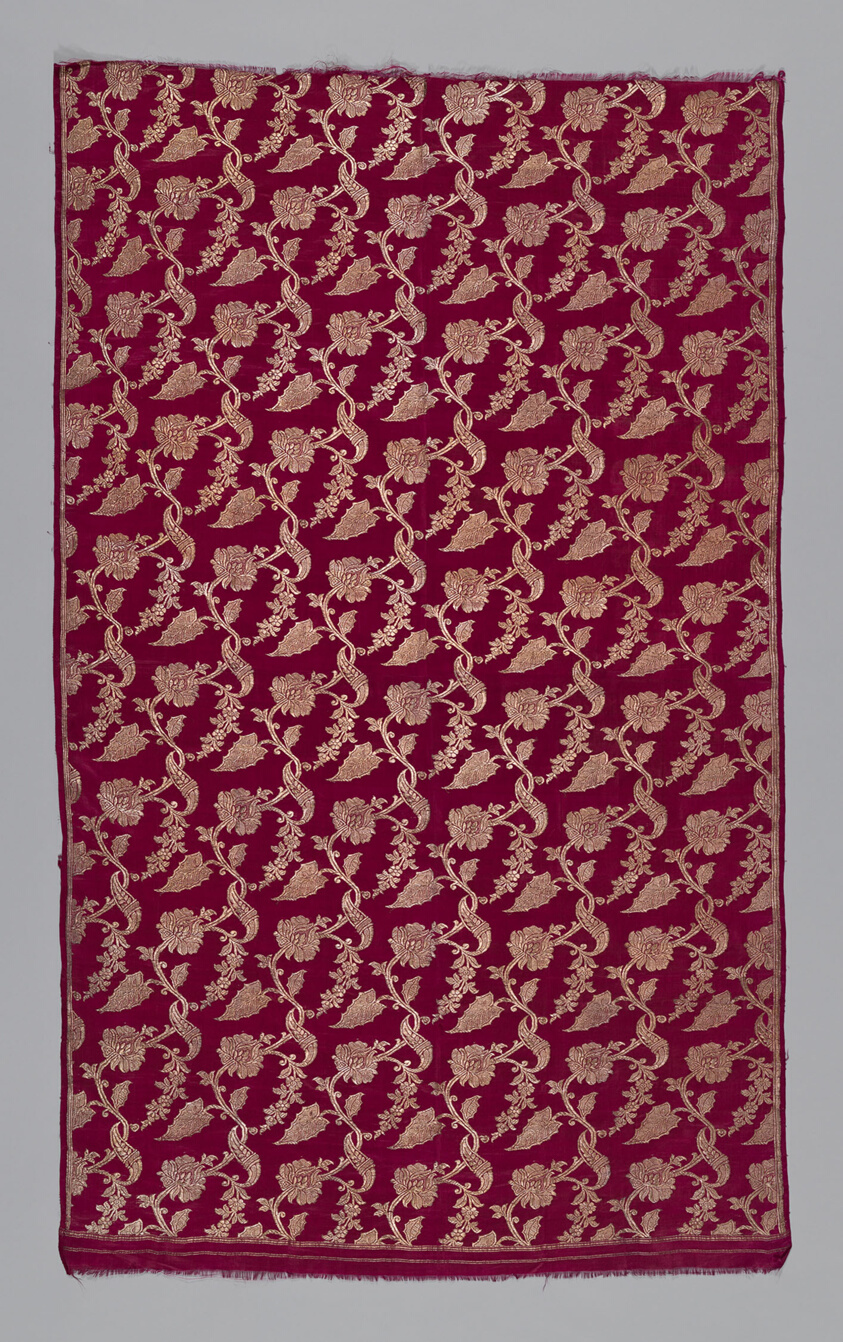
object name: Textile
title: Panel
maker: India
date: 19th century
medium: Silk, floral and vine pattern in gold on fuchsia ground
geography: India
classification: textile; hanging scroll; weaving; painting; asian art